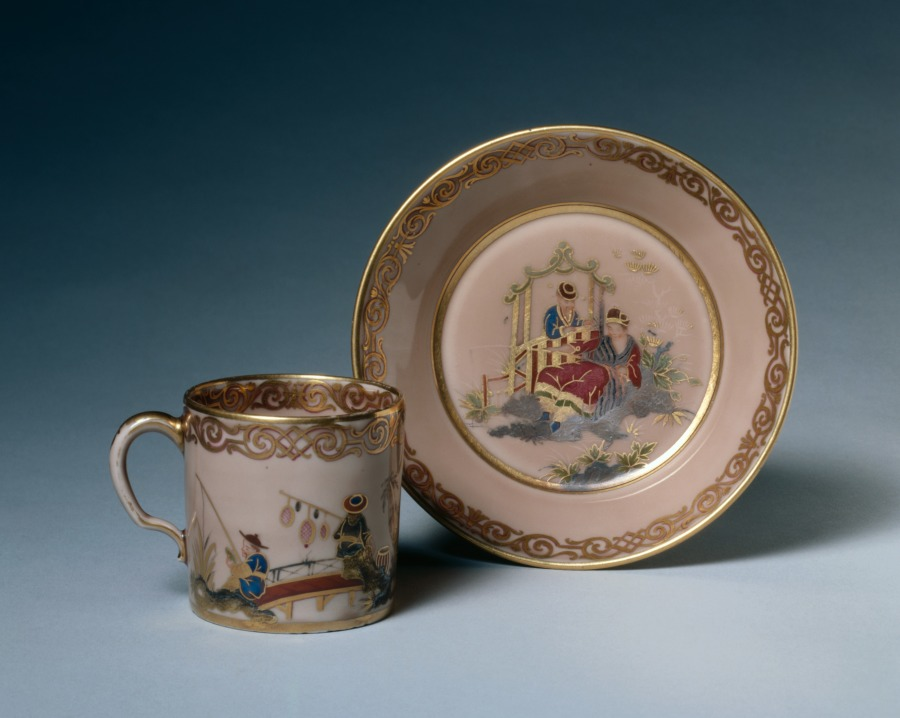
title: Cup and Saucer (Gobelet litron et soucoupe)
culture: France, Sèvres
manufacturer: Sèvres Porcelain Factory (French, est. 1756)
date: 1778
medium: hard-paste porcelain with overglaze enamel decoration and gilt and silver decoration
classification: Ceramic